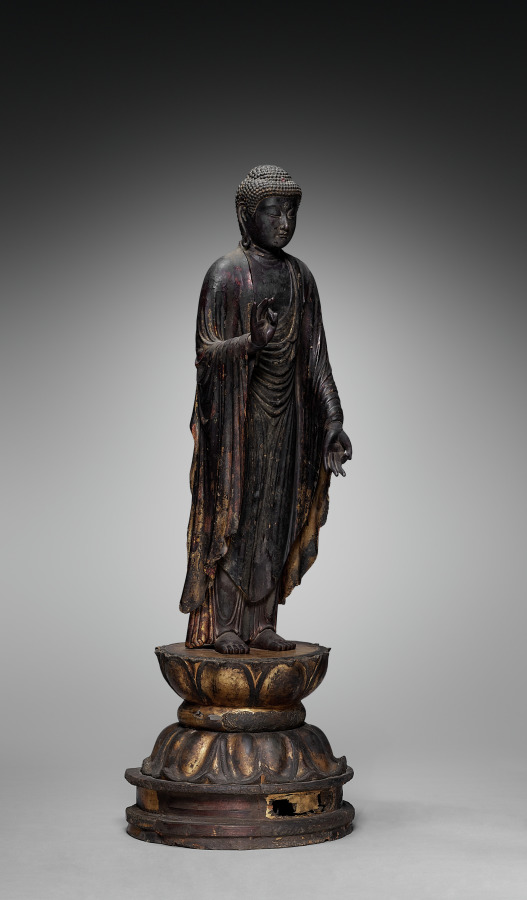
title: Amida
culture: Japan, Kamakura period (1185–1333)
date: 1200s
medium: Wood with lacquer and gilding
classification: Sculpture